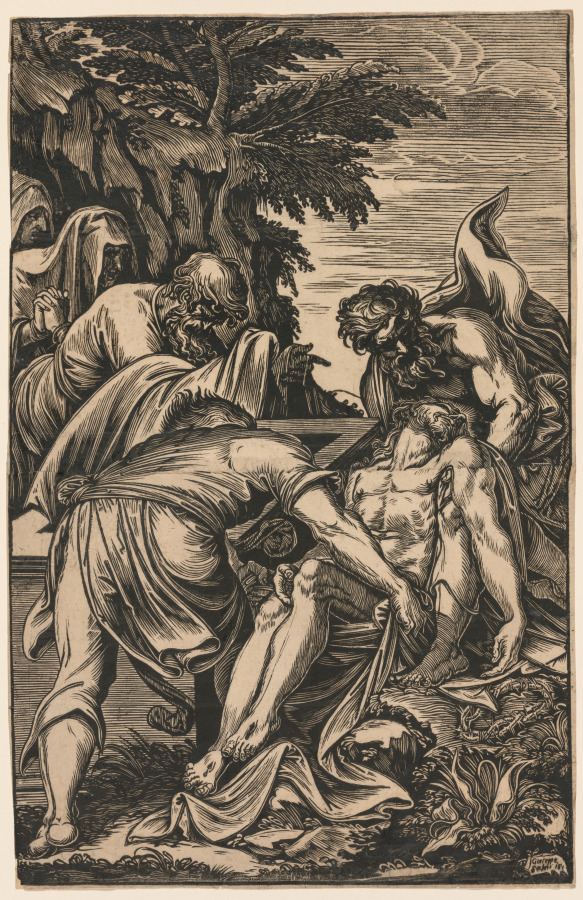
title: Entombment of Christ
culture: Italy, late 16th-early 17th century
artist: Giuseppe Scolari (Italian)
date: late 1500s-early 1600s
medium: woodcut on two sheets of joined paper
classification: Print